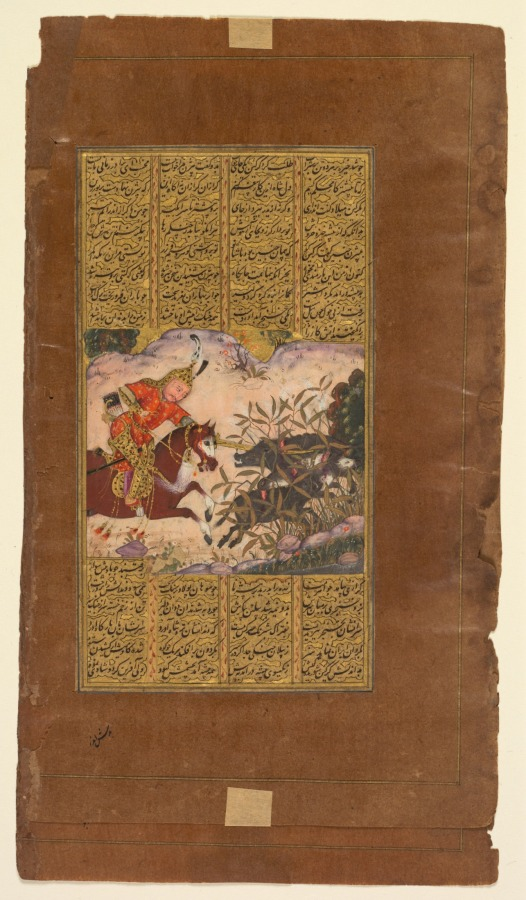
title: Bijan killing the wild boars of Irman, from a Shah-nama (Book of Kings) of Firdausi (Persian, about 934–1020) (verso)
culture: India, Bijapur, Deccan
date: c. 1610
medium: Gum tempera, ink, and gold on paper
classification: Painting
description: This illustrated page from a Shah-nama depicts the first adventure of the hero Bijan, son of an Iranian knight. When reports arrived at the king’s court of wild boars ravaging the borderlands between the enemy realms of Iran and Turan, Bijan volunteered to hunt and kill the beasts, much to the chagrin of his father, who doubted his young son’s ability to navigate the politically volatile situation. The fearless Bijan is shown on horseback as he singlehandedly strikes the bodies of the boars in the brush. After overzealously celebrating his success, Bijan must be rescued from a pit by Rustam. This early manuscript from the Deccan made for the sultan of Bijapur is characterized by glowing colors and lavish use of gold.